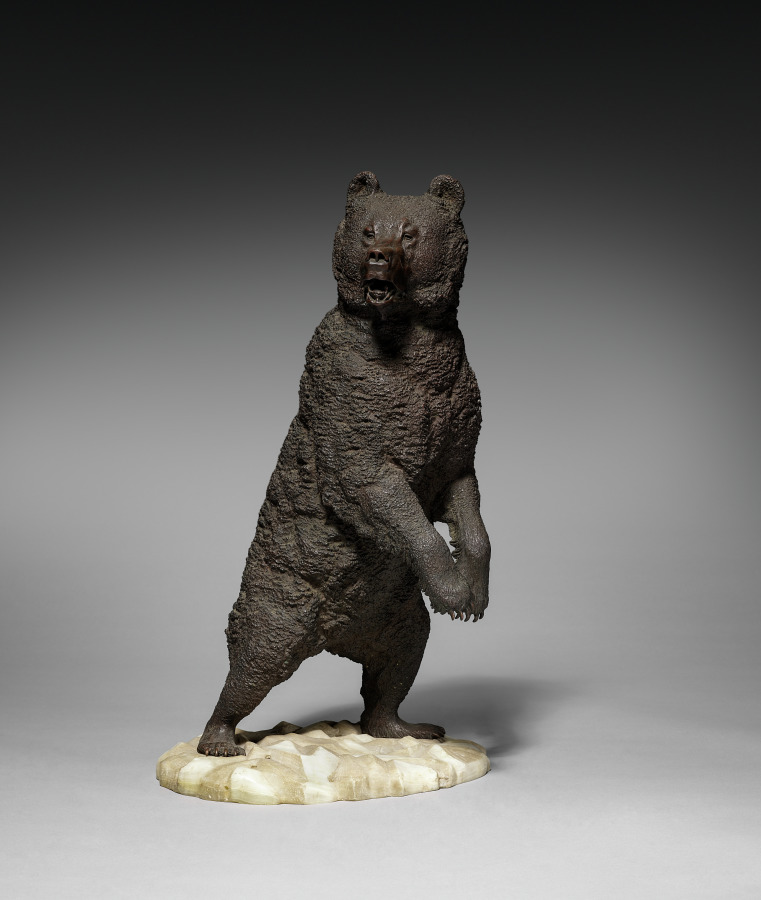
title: Bear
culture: Japan, Meiji period (1868–1912) to Shōwa period (1926–89)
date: c. 1900–1947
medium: bronze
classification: Sculpture